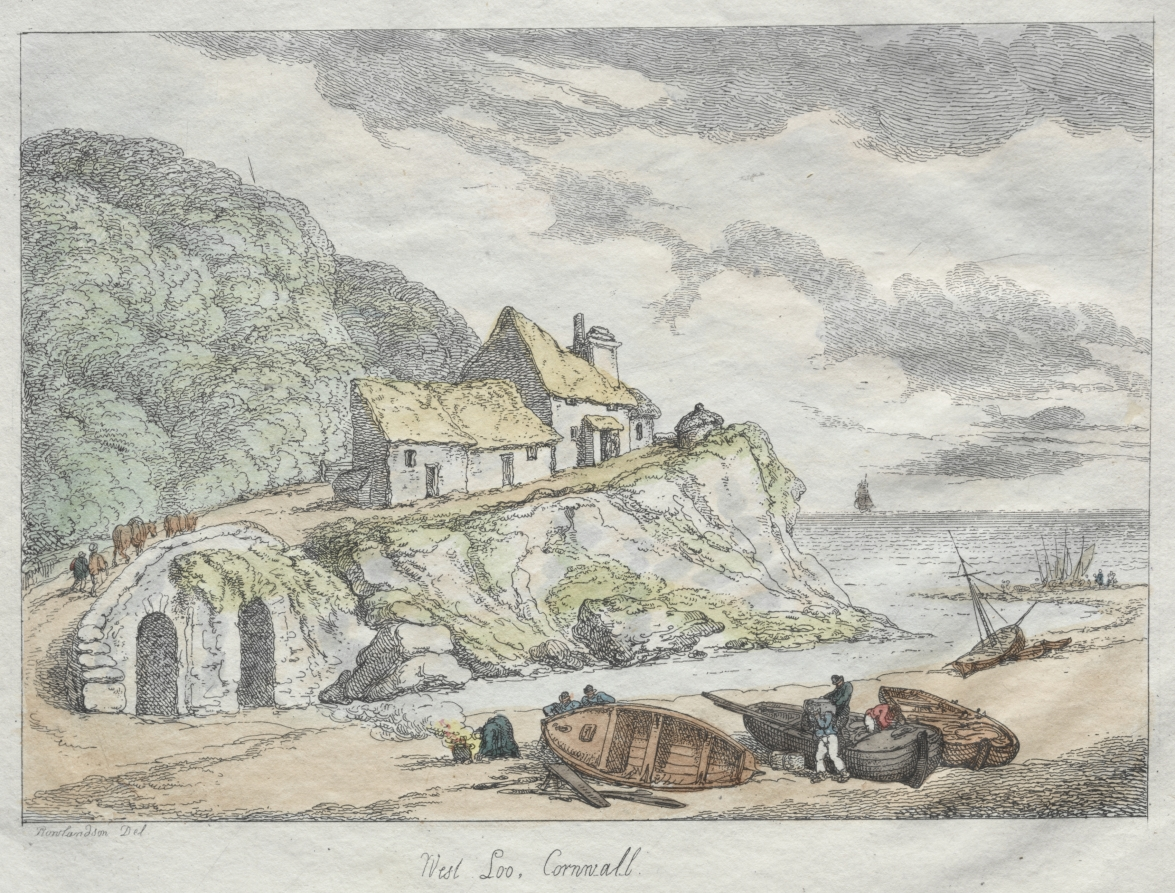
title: Rowlandson's Sketches from Nature: West Loo, Cornwall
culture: England, 19th century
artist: Thomas Rowlandson (British, 1756–1827)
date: 1822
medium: etching, hand colored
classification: Print